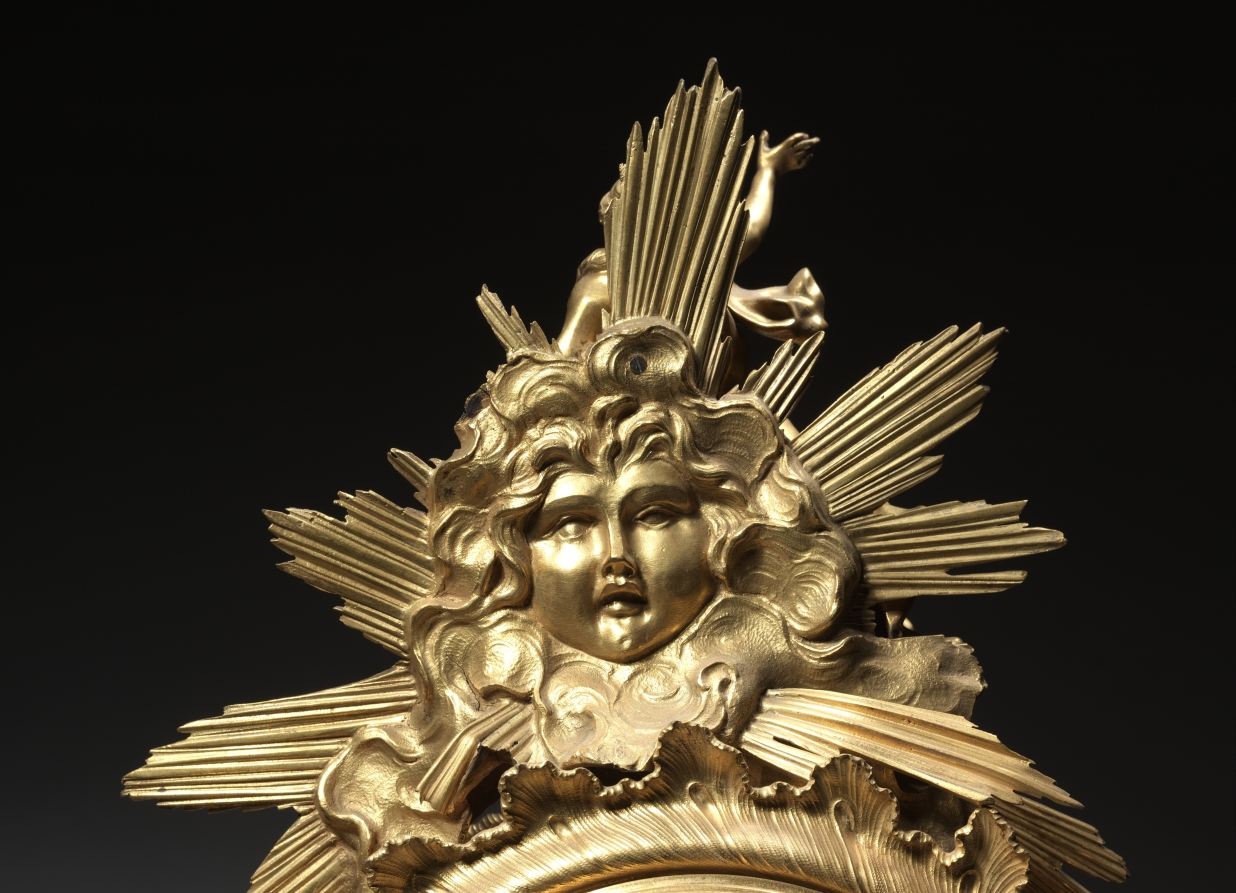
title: Clock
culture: France, 18th century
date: c. 1750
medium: gilt bronze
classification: Furniture and woodwork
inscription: on clock face: JOUARD A PARIS; engraved on plaque attached to back of clock face: Jouard Paris.